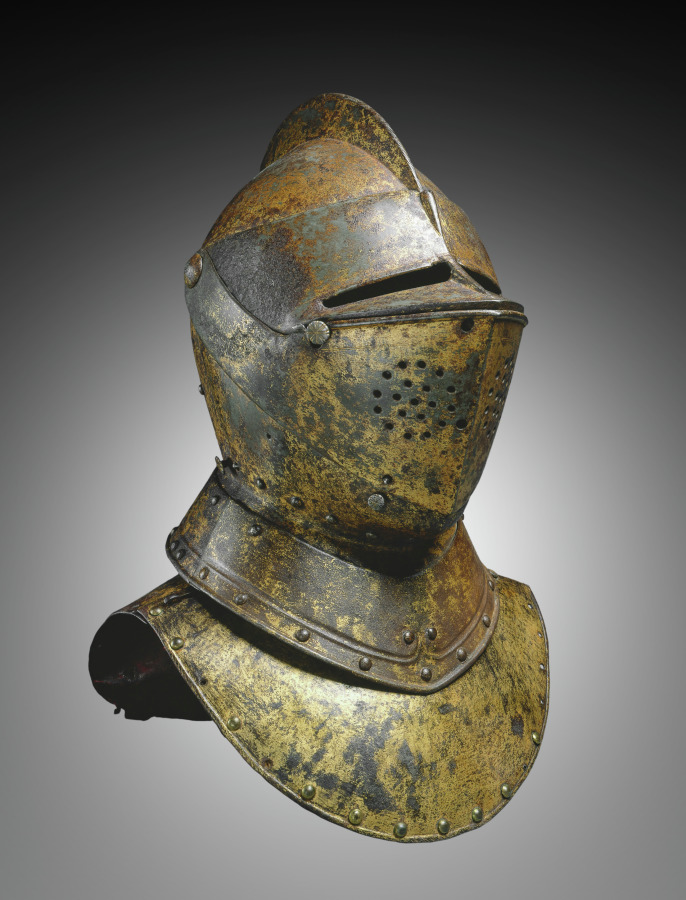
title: Close Helmet (from a funerary achievement?)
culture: Holland (?), late 16th-early 17th Century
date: c.1590–1625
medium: gilded steel (invaded with rust); red velvet lining, plume holder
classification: Arms and Armor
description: This helmet was originally intended for field use. Later, it seems to have served a funerary purpose, probably as an ornament (known as a funerary achievement) suspended over the church tomb of an unidentified knight. As such, it would have been a rich and imposing symbol of the dead knight's social rank and personal authority.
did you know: This helmet was decorated with a technique known as fire-gilding, an incredibly toxic process involving mercury that produced a gold finish, now worn away.